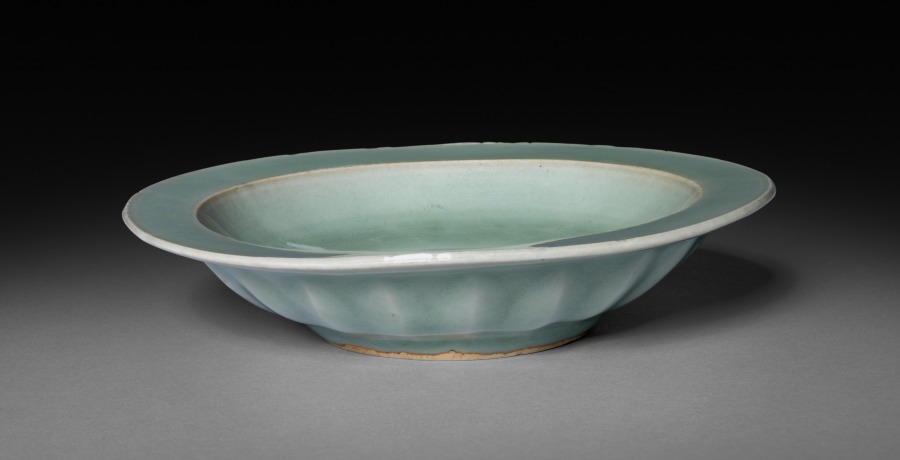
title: Dish with Two Fish in Relief: Longquan Ware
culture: China, Zhejiang province, Yuan dynasty (1271-1368)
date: early 14th Century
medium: glazed porcelain with unglazed molded decoration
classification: Ceramic